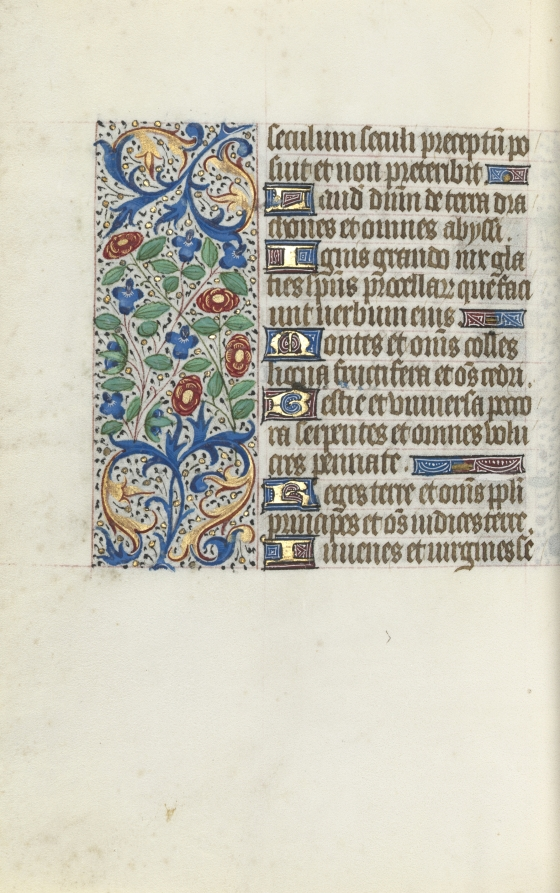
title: Book of Hours (Use of Rouen): fol. 141v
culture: France, Rouen, 15th century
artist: Master of the Geneva Latini (French, active Rouen, 1460–80)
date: c. 1470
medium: ink, tempera, and gold on vellum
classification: Bound Volume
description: In the late 1400s and early 1500s Rouen was an established and important center of book production. The city’s cathedral had a wealthy chapter that spent large sums of money to commission books and to maintain its extensive library. The stationers and booksellers would have likely been concentrated in or near the cathedral precinct. This artist, named after a manuscript now in Geneva, was Rouen’s principal illuminator during the second half of the 1400s.